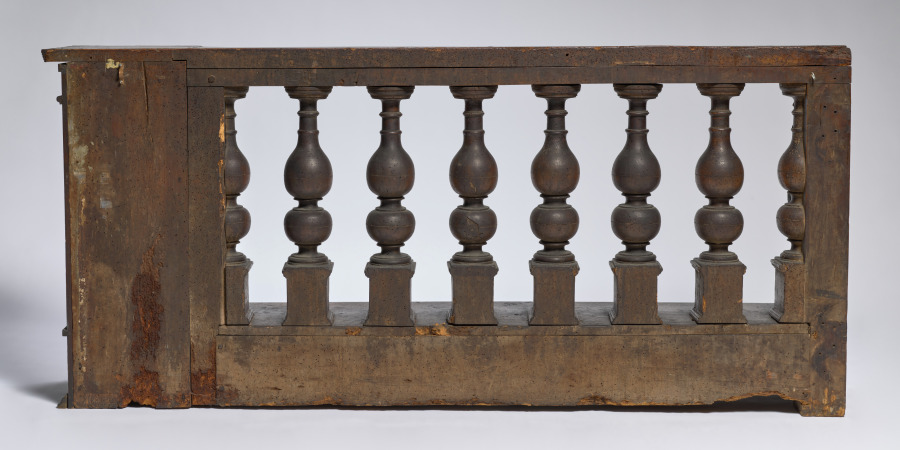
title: Balustrade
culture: Italy, 17th century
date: c. 1630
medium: carved and turned walnut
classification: Furniture and woodwork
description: This balustrade, or railing, was probably intended for use in a private house, perhaps to set off a bed alcove.